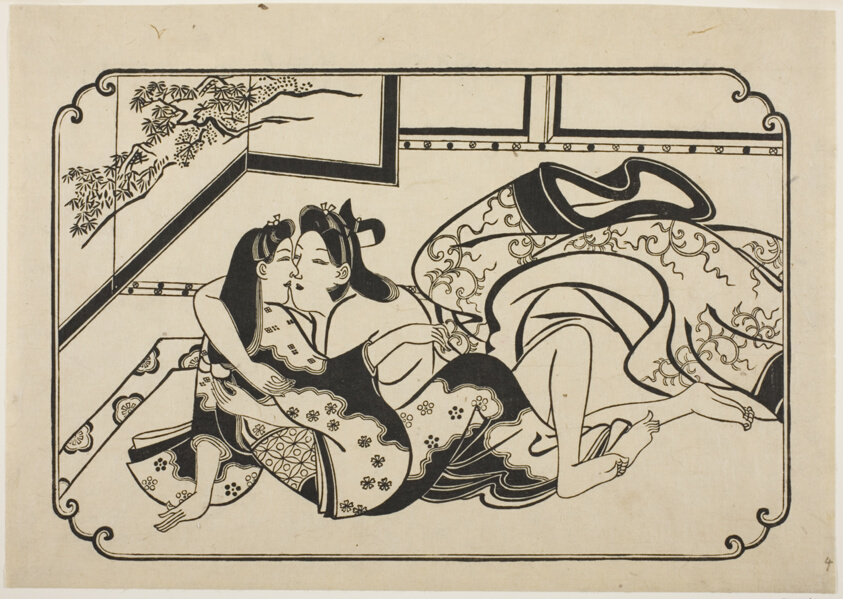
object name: Print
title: Flirting Lovers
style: Japanese (culture or style)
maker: Hishikawa Moronobu (Japanese, (?)-1694)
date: c. 1673/81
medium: Woodblock print; sumizuri-e, oban yoko-e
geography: Japan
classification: woodblock print; print; asian art; woodblock